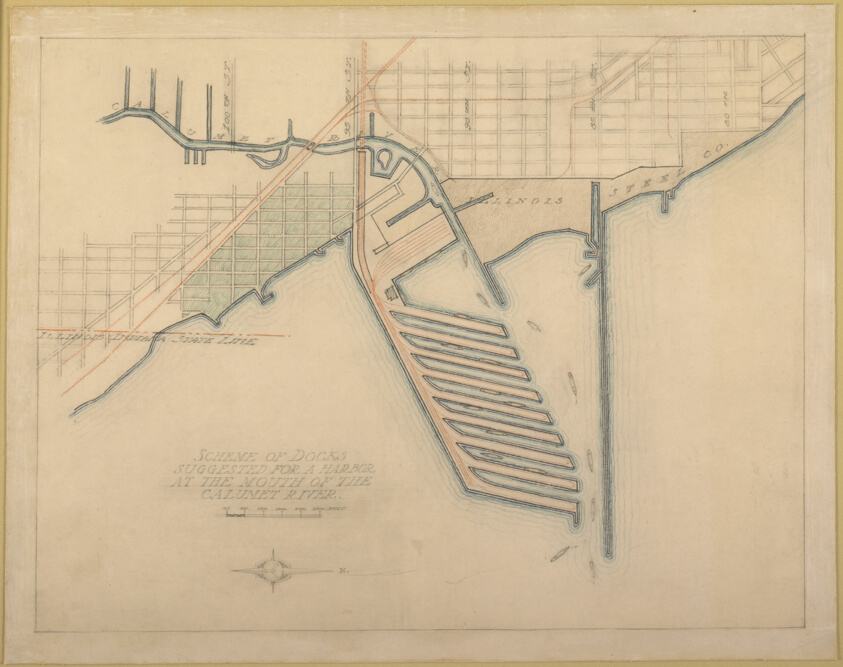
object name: Architectural Drawing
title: Plate 72 from The Plan of Chicago, 1909: Chicago. Sketch Diagram of Docks Suggested at the Mouth of the Calumet River for Bulk Freight Steamers; Access To Be Had Without Opening of Bridges.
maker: Daniel Hudson Burnham, American, 1846-1912; Edward Herbert Bennett, American, born England, 1874-1954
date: 1909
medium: Graphite and colored pencil on paper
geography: Chicago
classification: graphite; architectural drawing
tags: Chicago, architecture